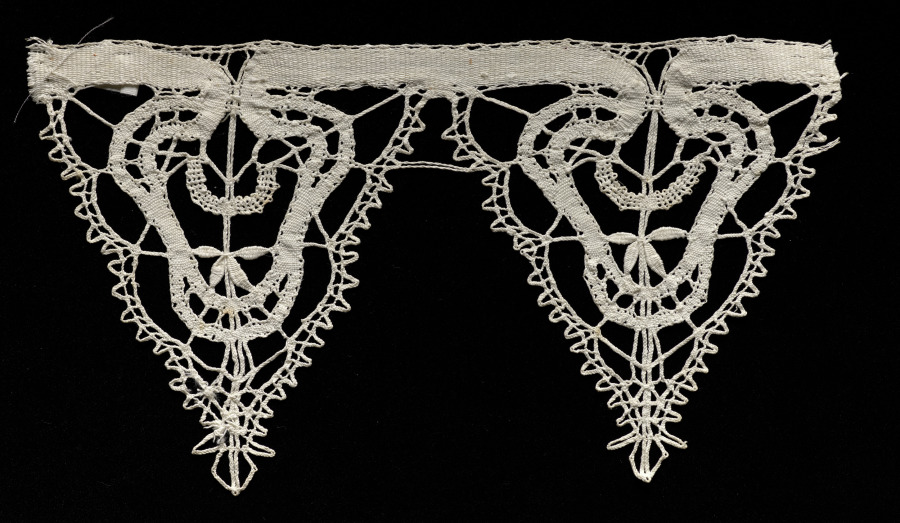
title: Lace Edging of Points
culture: Italy, Genoa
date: 1600s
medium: Bobbin lace (needle lace design)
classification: Lace